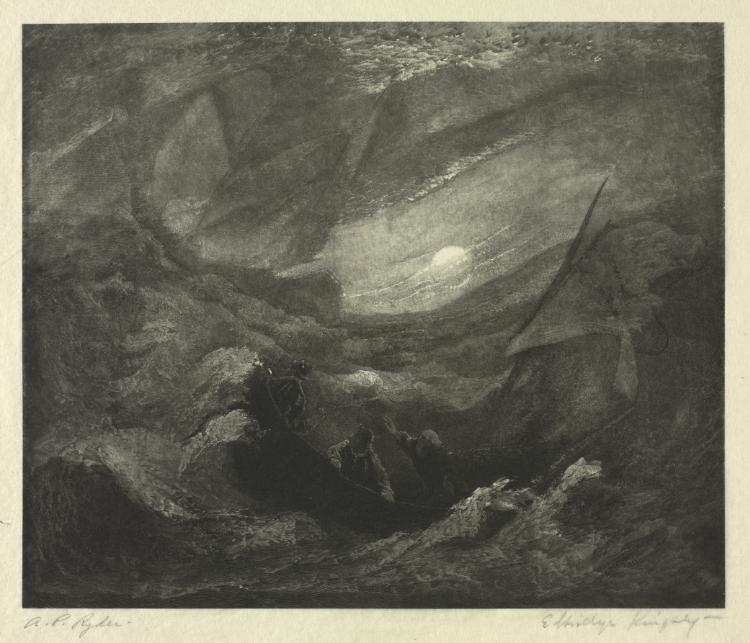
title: The Flying Dutchman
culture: America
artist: Elbridge Kingsley (American, 1841–1915)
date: 1887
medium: wood engraving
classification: Print